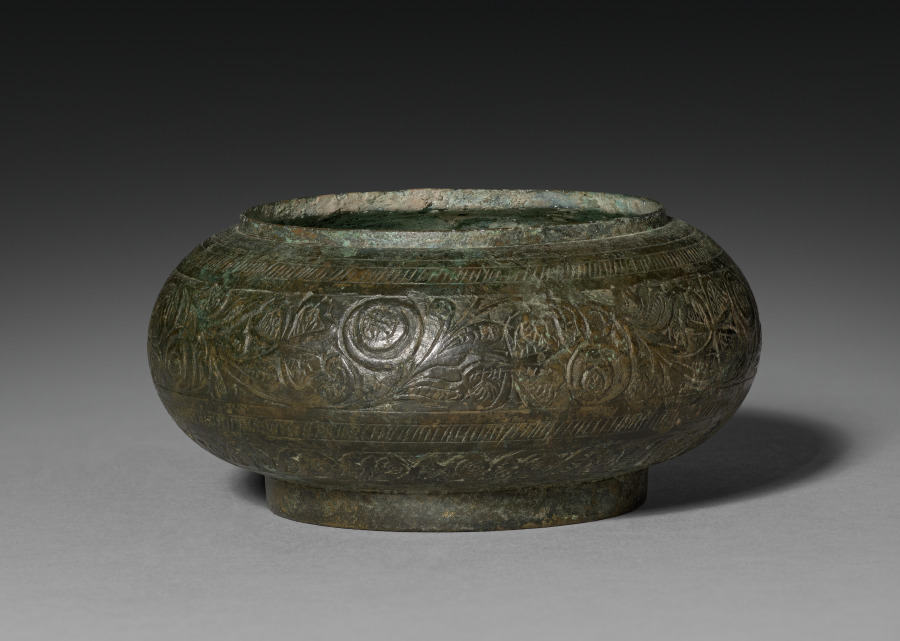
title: Reliquary Box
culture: Pakistan, Gandhara, probably Swat, late Kushan period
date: 200–400 CE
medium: bronze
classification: Metalwork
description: This casket in bronze represents the great variety of reliquary caskets. It is round, has a low foot, and is covered with a lid (with raised handle) that fits over the vessel rather than being inset. It is a traditional shape frequently encountered in Gandharan reliquaries, but its slight flattening and elaborate decoration imply a slightly late date. A central band of a floral creeper decorates the main body of the box and its lid, and is framed on both sides by narrower fluted bands. This type of freehand design is characteristic of the late Kusana-early Gupta period. Similar floral patterns are found in another CMA object (1972.164), the lid of a box showing combat between a man and a lion, which also dates to a later period. There the design fills the vacant areas in the busy composition. This pattern, however, has its antecedents in the Begram ivories . which, according to most sources, pre-date the Sasanian invasion of the mid-third century AD. Therefore, it can be assumed that this type of floral decoration was already in use in the third century and that this reliquary box probably dates to the third-fourth century AD. The bronze alloy, in its somewhat silverish-metallic appearance, seems to be very close to the material used in the Swat bronzes, which suggests that Swat may also be the provenance for this reliquary.